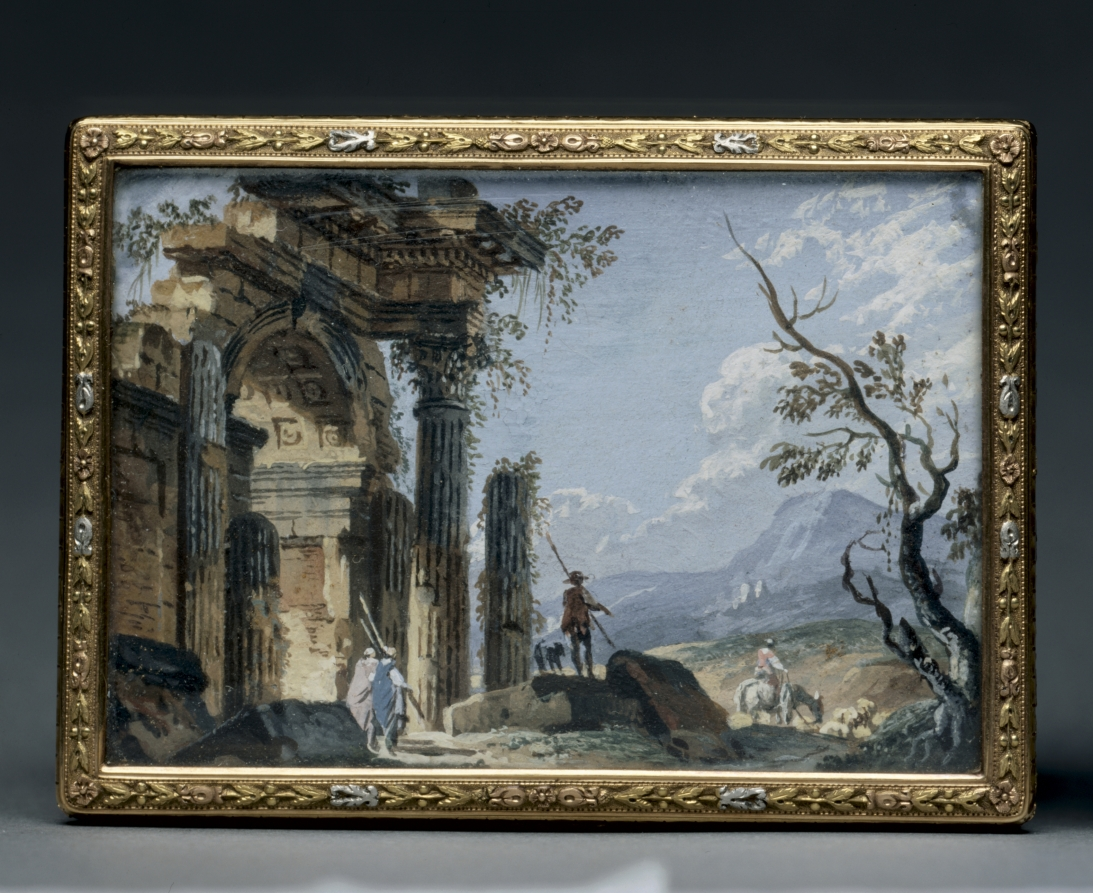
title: Rectangular Box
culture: France, 19th century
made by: Alexandre Leferre (French)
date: c. 1840–1850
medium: gouache miniatures mounted on gold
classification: Miscellaneous